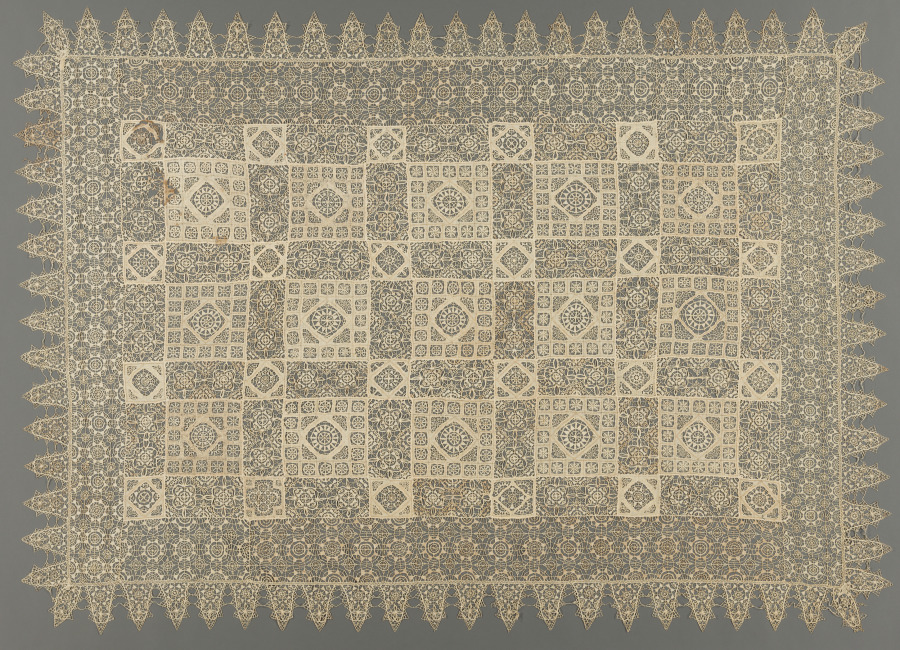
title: Lace Cloth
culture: Italy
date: 1560–1600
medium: Linen; needle lace (cutwork and reticella)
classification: Lace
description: Consisting of more than 80 squares of cutwork (a cut and embellished linen ground) and rectangles of reticella (needle lace), this luxurious cover could have been made by a single person or several people who divided the work. Close looking reveals that the cloth is made with threads of two very slightly different colors: bleached and unbleached linen. Together the sections resemble snowflakes, which are of similar shape and size but vary subtly from one another. The perplexing dark stitches in the upper left corner do not repair damage, and might be the maker’s signature.